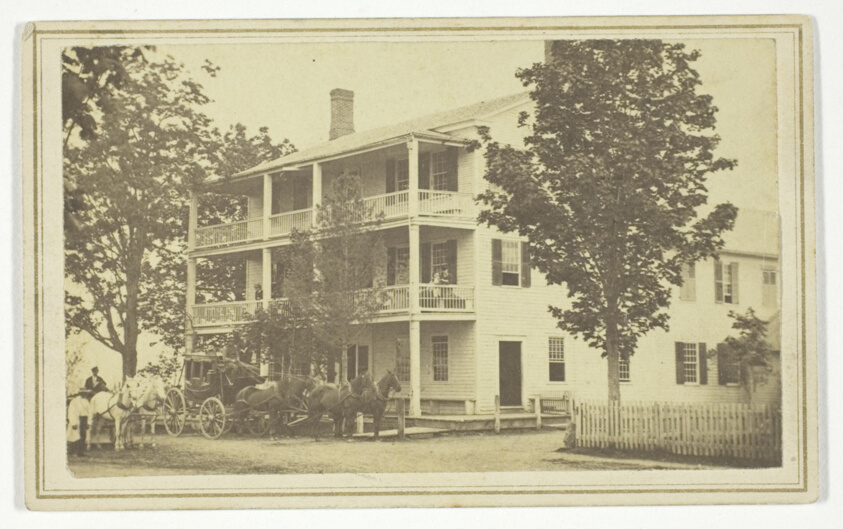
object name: Photograph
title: Untitled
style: 19th century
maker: T. G. Richardson (American, 19th century)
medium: Albumen print (carte-de-visite)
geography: United States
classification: carte-de-visite (albumen); photographic process; photography; card photographs; photograph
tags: Collected by Hugh Edwards